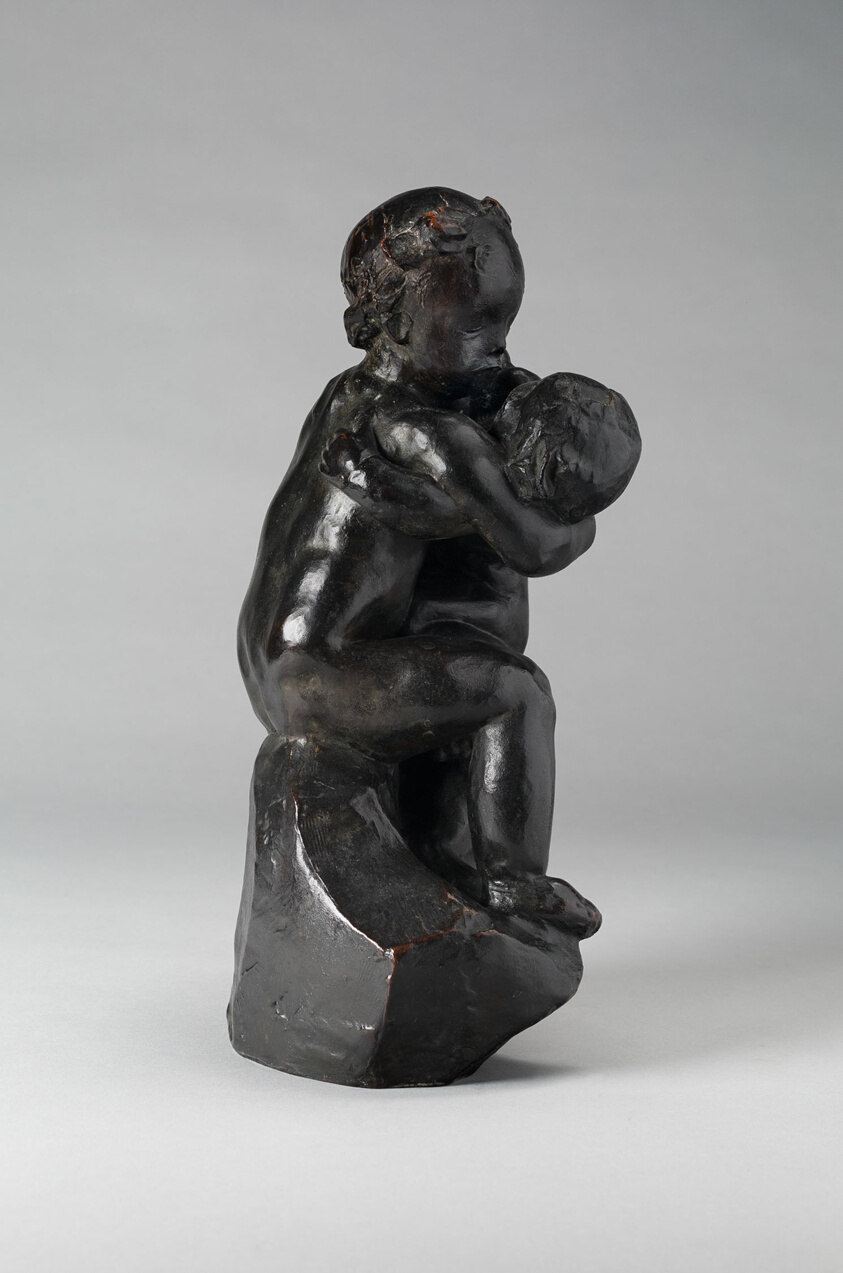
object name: Sculpture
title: Children Embracing (Enfants s’embrassant)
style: nineteenth century, 19th century, 20th Century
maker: Auguste Rodin (French, 1840–1917)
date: Modeled c. 1881, cast before 1916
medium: Brown patinated bronze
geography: France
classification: statuette; sculpture; bronze; french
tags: children, babies, child